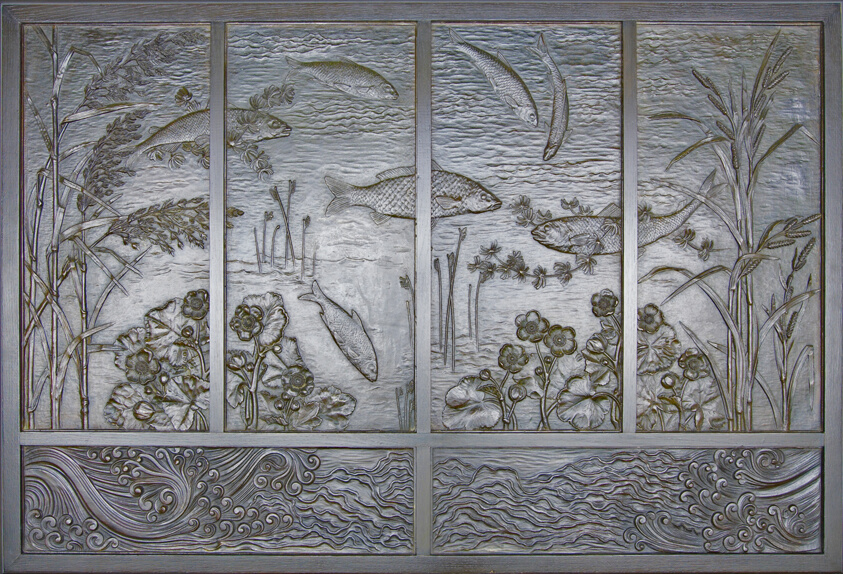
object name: Metalwork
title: Fountain Panel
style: Japanism, japonism, design reform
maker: Designed by Thomas Jeckyll (English, 1827–1881); Made by Barnard, Bishop and Barnards, (Norwich, England, 1826–1908)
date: 1871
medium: Bronze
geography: Norwich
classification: bronze; european decorative arts; furniture; metalwork; gates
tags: fish, furniture, underwater